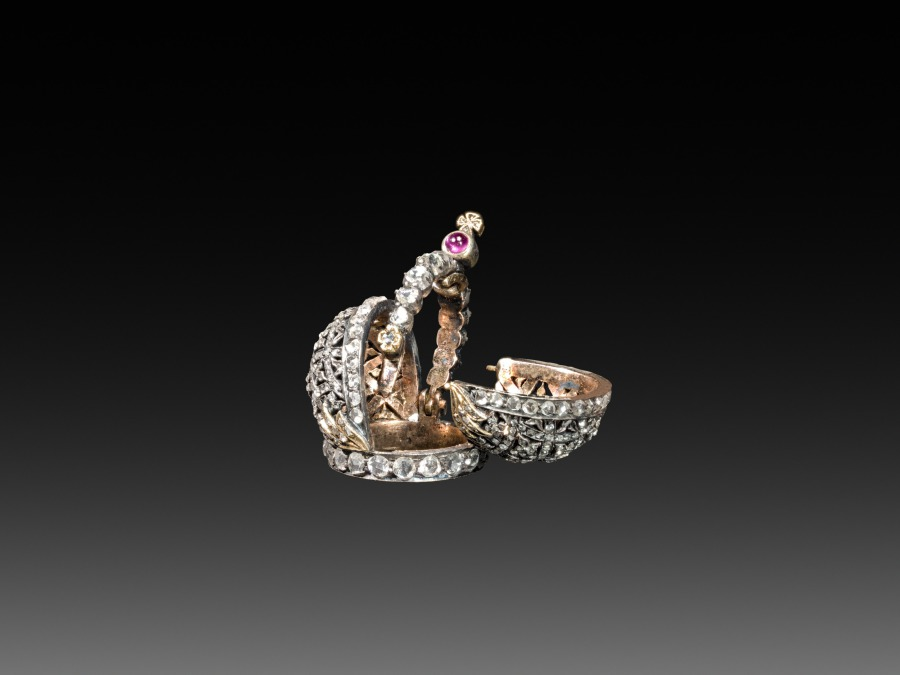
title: Miniature Crown Surprise from the Lapis Lazuli Easter Egg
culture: Russia, St. Petersburg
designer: attributed to Peter Carl Fabergé (Russian, 1846–1920)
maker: attributed to House of Fabergé (Russian, 1842–1918)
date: c. 1885–90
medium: gold, enamel, lapis lazuli, pearls, diamonds, rubies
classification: Miscellaneous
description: This Easter egg, like the subsequent ones produced by Fabergé for the imperial family, contains a surprise when opened. In this case, the egg opens to display a yellow enameled cover, resembling an egg yolk, which then opens to reveal a tiny replica of the Russian imperial crown, containing either a ruby or a pink sapphire suspended on a chain.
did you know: The tiny diamond encrusted crown surprise is a replica of the Russian imperial crown made for Empress Catherine the Great in the 1700s.